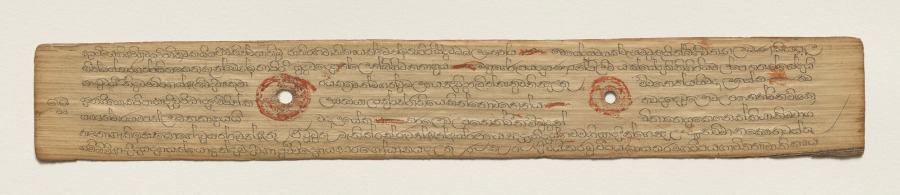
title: Leaf from a Buddhist Manuscript (recto)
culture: Sri Lanka, Singhalese, Late 17th century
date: c. 1700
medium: fiber paper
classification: Manuscript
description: Palm leaf material is still used for manuscripts in Sri Lanka. The palm leaves are prepared first by boiling them, drying them in the sun, and then rubbing them with oils. Scribes then use a metal stylus to incise the text. Then charcoal powder is wiped across the pages, filling in only the inscribed lines.